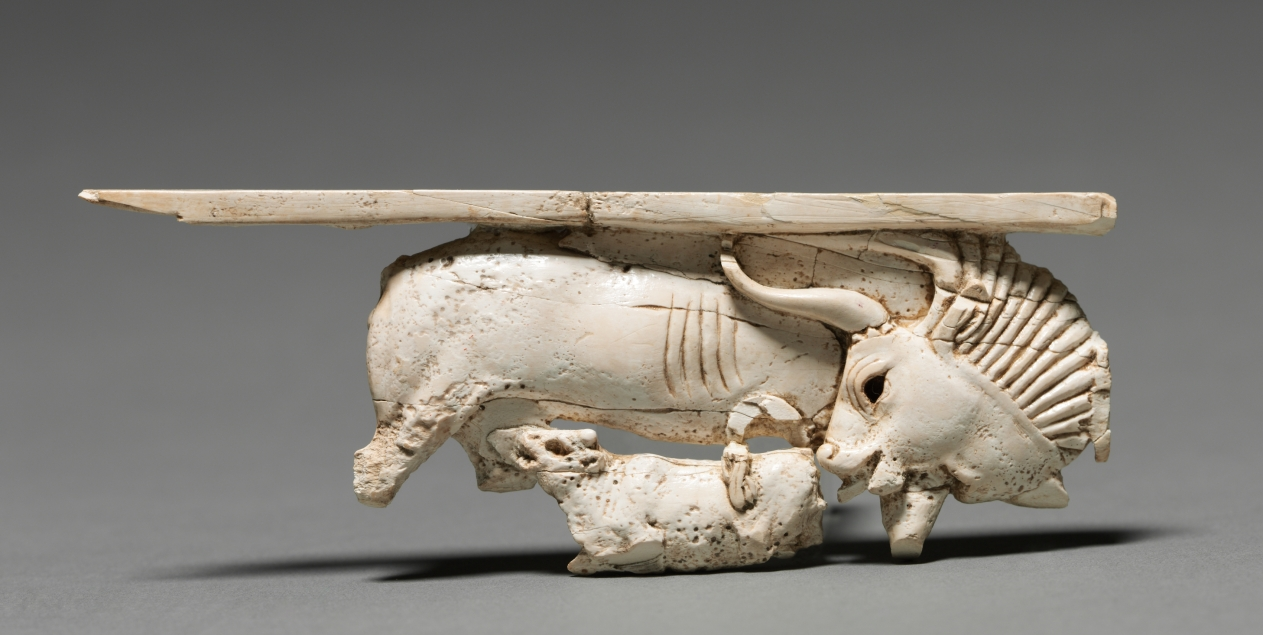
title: Decorative Plaque: Cow Nursing Its Calf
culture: Phoenicia, Iraq, Nimrud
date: 900–800 BCE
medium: ivory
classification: Ivory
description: This small plaque was executed in the Phoenician style with symmetrical compositions, elongated figural proportions, and Egyptian subjects and motifs. Examples have been found throughout the Middle East, but thousands come from Nimrud where most were excavated in the storerooms of a military arsenal built by King Shalmaneser II (858-824 bc). When the Nimrud palace was sacked in the 7th century bc, these ivories were thrown into a well, where Sir Max Mallowan (the husband of Agatha Christie) discovered them in 1951. The monumental wall relief (1943.246) was found at the same Assyrian palace at Nimrud.